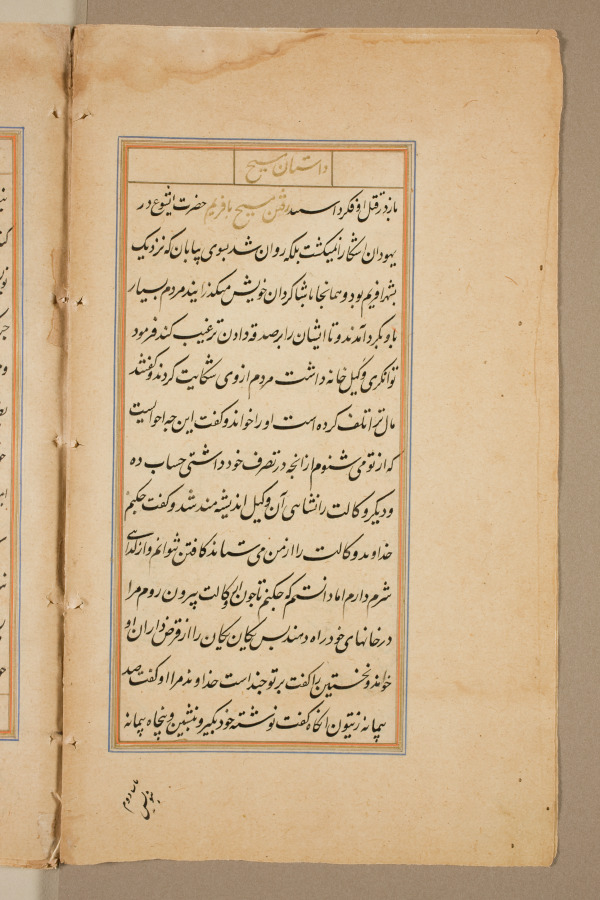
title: Text page from a Mirror of Holiness (Mir’at al-quds) of Father Jerome Xavier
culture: Mughal India, Allahabad, made for Prince Salim (1569–1627)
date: 1602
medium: Ink and gold on paper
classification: Manuscript